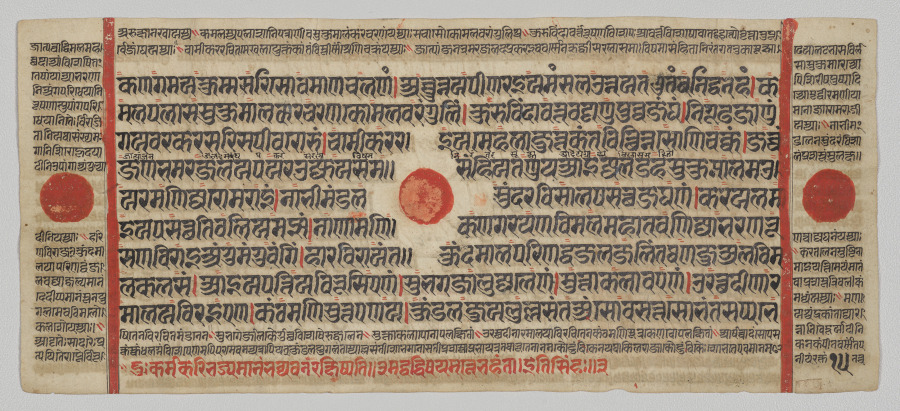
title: Text, Folio 15 (verso), from a Kalpa-sutra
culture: Western India, Gujarat, last quarter of the 15th century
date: c. 1475–1500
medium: Gum tempera, ink, and gold on paper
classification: Painting